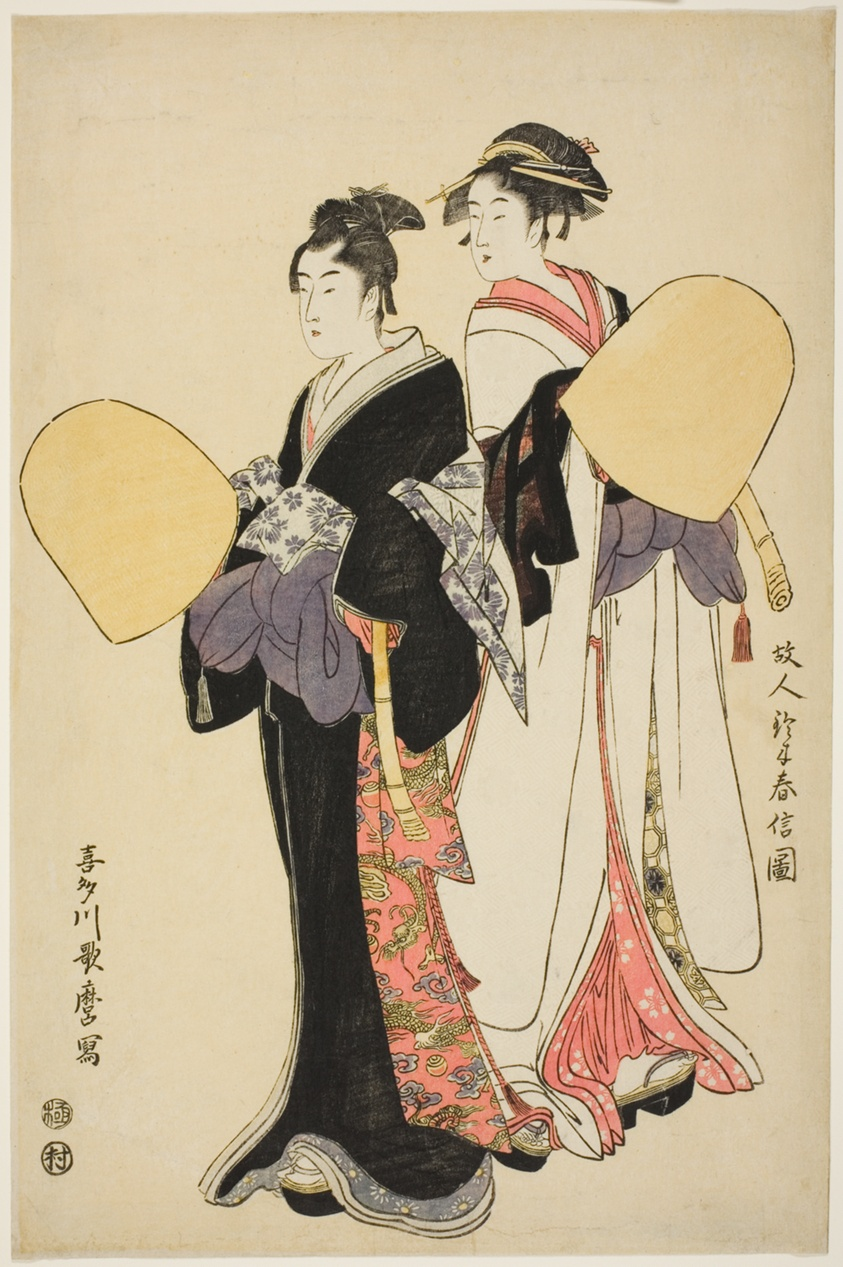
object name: Print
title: Young Couple Dressed as Mendicant Monks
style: Japanese (culture or style)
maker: Kitagawa Utamaro 喜多川 歌麿; Japanese, 1753 (?)-1806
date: c. 1794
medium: Color woodblock print; oban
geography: Japan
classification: woodblock print; print; asian art